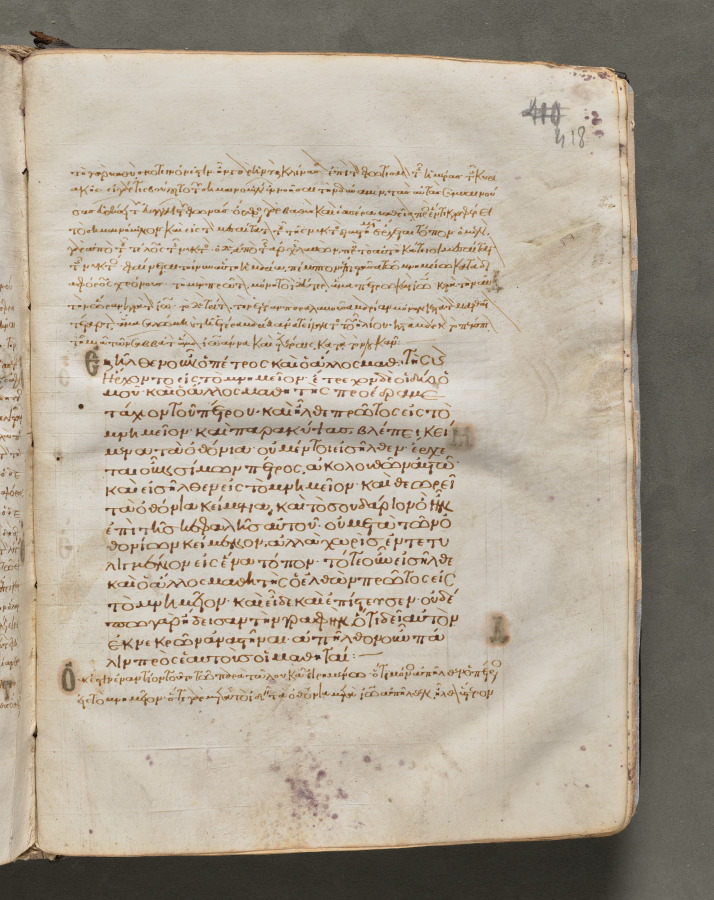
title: Text, folio 418 (recto), from a Gospel Book with Commentaries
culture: Byzantium, Constantinople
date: c. 1000–1100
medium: ink, tempera, and gold on vellum; leather binding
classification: Bound Volume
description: Each of the four gospels in this book opens on a page with brilliantly illuminated borders depicting the author of the text as well as birds—principally peacocks, symbols of the immortality of the soul—and fountains, representing the fountain of life and the salvation of the soul. This volume consists of 428 leaves with texts in Greek. Its level of sophistication suggests that it was probably written and decorated in a monastery in Constantinople.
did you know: Gospel books were carried in procession through Byzantine churches.